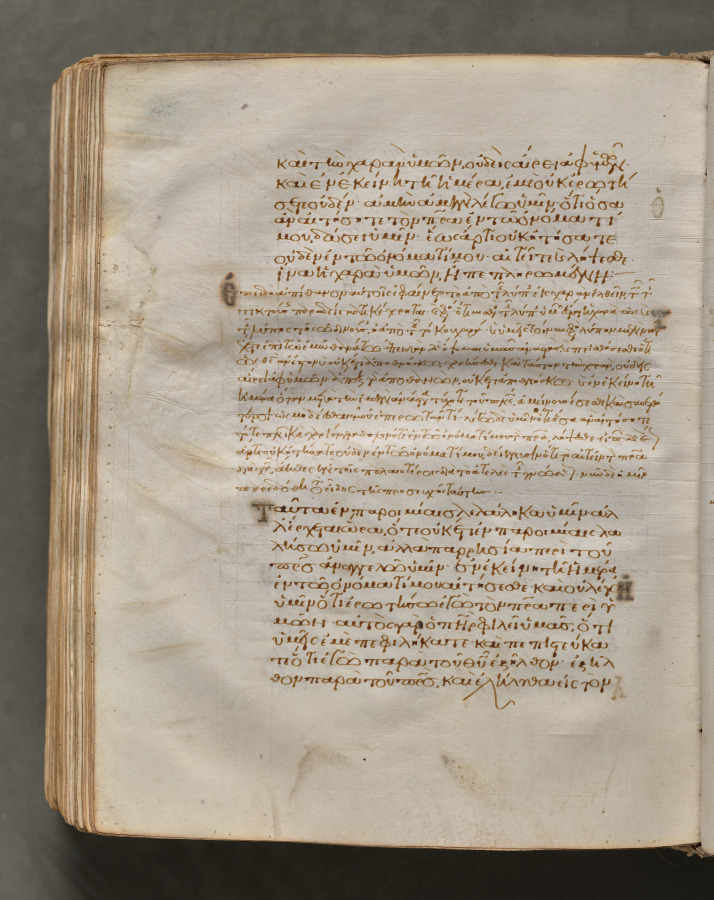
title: Text, folio 401 (verso), from a Gospel Book with Commentaries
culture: Byzantium, Constantinople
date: c. 1000–1100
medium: ink, tempera, and gold on vellum; leather binding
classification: Bound Volume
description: Each of the four gospels in this book opens on a page with brilliantly illuminated borders depicting the author of the text as well as birds—principally peacocks, symbols of the immortality of the soul—and fountains, representing the fountain of life and the salvation of the soul. This volume consists of 428 leaves with texts in Greek. Its level of sophistication suggests that it was probably written and decorated in a monastery in Constantinople.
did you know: Gospel books were carried in procession through Byzantine churches.